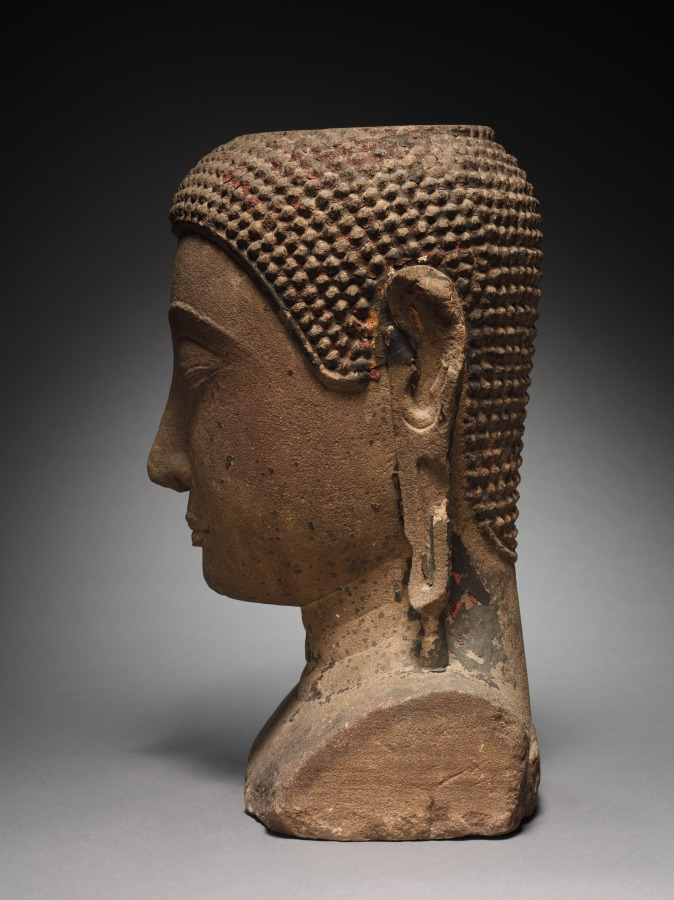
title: Head of Buddha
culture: Thailand, Ayutthaya, 14th-15th century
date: 1350–1425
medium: sandstone and lacquer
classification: Sculpture